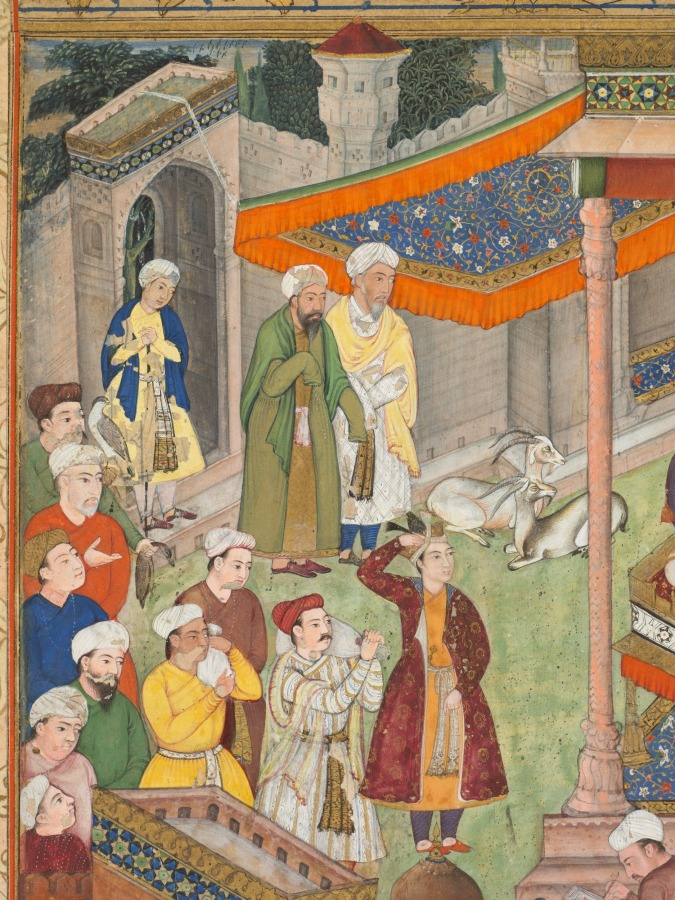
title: Babur receives booty and Humayun’s salute after the victory over Sultan Ibrahim in 1526, from an Akbar-nama (Book of Akbar) of Abu’l Fazl (Indian, 1551–1602)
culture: Mughal India, court of Akbar (reigned 1556–1605)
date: c. 1596–1597 or 1604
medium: Gum tempera and gold on paper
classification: Painting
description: The first Mughal emperor Babur sits enthroned as men bring gifts and sacks of tribute to mark a successful expansion of his territories. Emblematic of his role in leading the victory, his son Humayun wears a wine-and-gold robe of honor despite the Delhi heat in late April. Marking the royal space are a carpet and canopy painted with a lapis lazuli ground. The floral vine motif called arabesque swirls around a central lobed medallion. These delicate patterns are inspired from Persian manuscript illuminations. Contemporary historians describe awnings of gold embroidery, brocade, and velvet along with colorful carpets resembling a beautiful flower bed.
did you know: A clerk records the amount of tribute that Babur received from conquered kings.